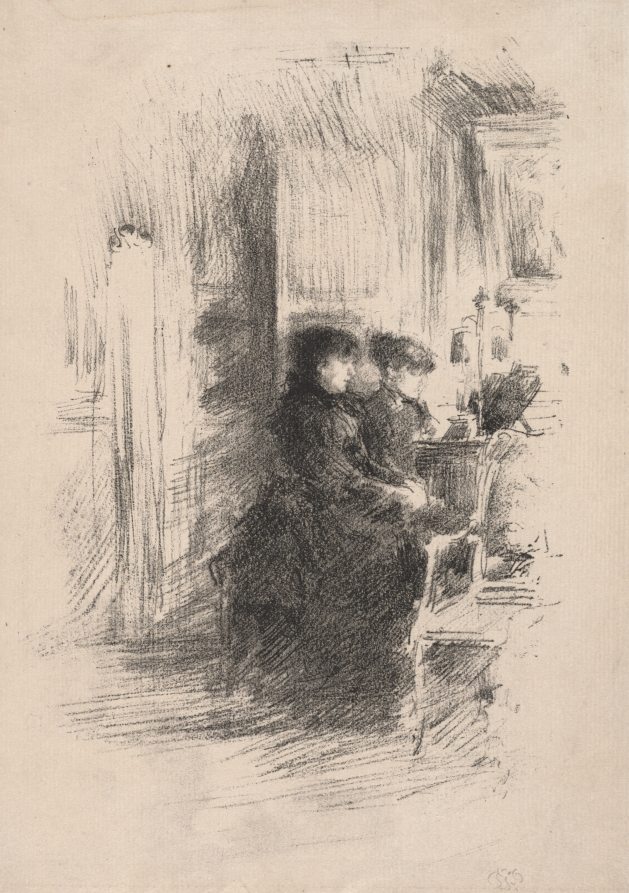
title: The Duet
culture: America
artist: James McNeill Whistler (American, 1834–1903)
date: 1894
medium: lithograph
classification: Print